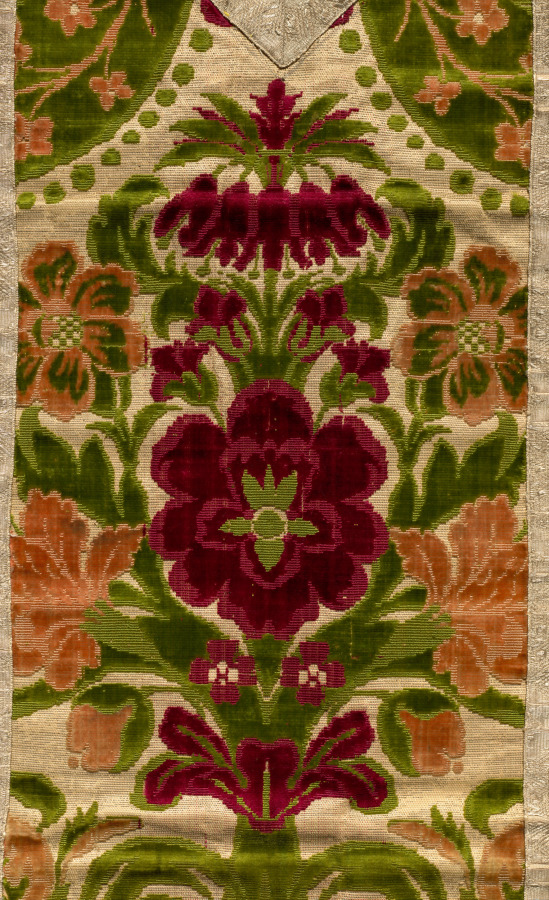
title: Chasuble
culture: Italy, Genoa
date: c 1600–1700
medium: Silk and gilt metal threads, woven; cut and uncut velvet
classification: Velvet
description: This sumptuous polychrome velvet displays a central vase with abundant flora and exotic leaves flanking curving blossoming fronds on a gilt-metal thread ground. The pattern was created with five colors of cut and uncut (loops) velvet pile. Only the pile warps for the lush green velvet occur across the entire cloth, while each additional color appears in vertical stripes—crimson, peach, rose, and purple. These widely acclaimed velvets from Genoa were the most colorful woven in Europe. Both the long stole and the shorter maniple are insignia of the office of deacons, priests, and the higher clergy. The stole was worn under a chasuble according to the office and the maniple was hung on the left forearm. The burse is a stiff receptacle in which the folded corporal, a white linen cloth on which the sacred bread and chalice are placed during the Mass, is carried to and from the altar. The upper fabric matches the chasuble, the bottom is a plain silk, and the interior has an obligatory linen lining.